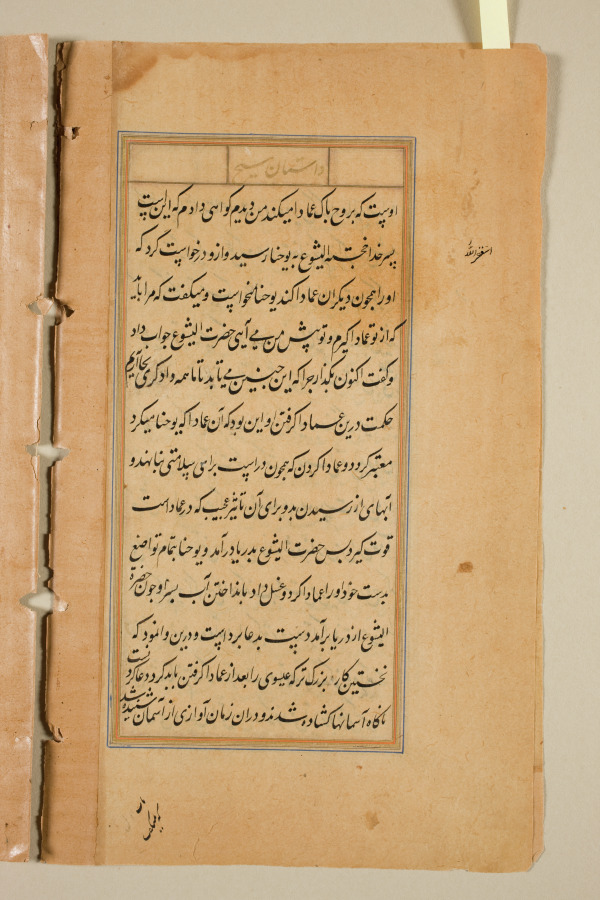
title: Text page from a Mirror of Holiness (Mir’at al-quds) of Father Jerome Xavier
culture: Mughal India, Allahabad, made for Prince Salim (1569–1627)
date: 1602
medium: Ink and gold on paper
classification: Manuscript